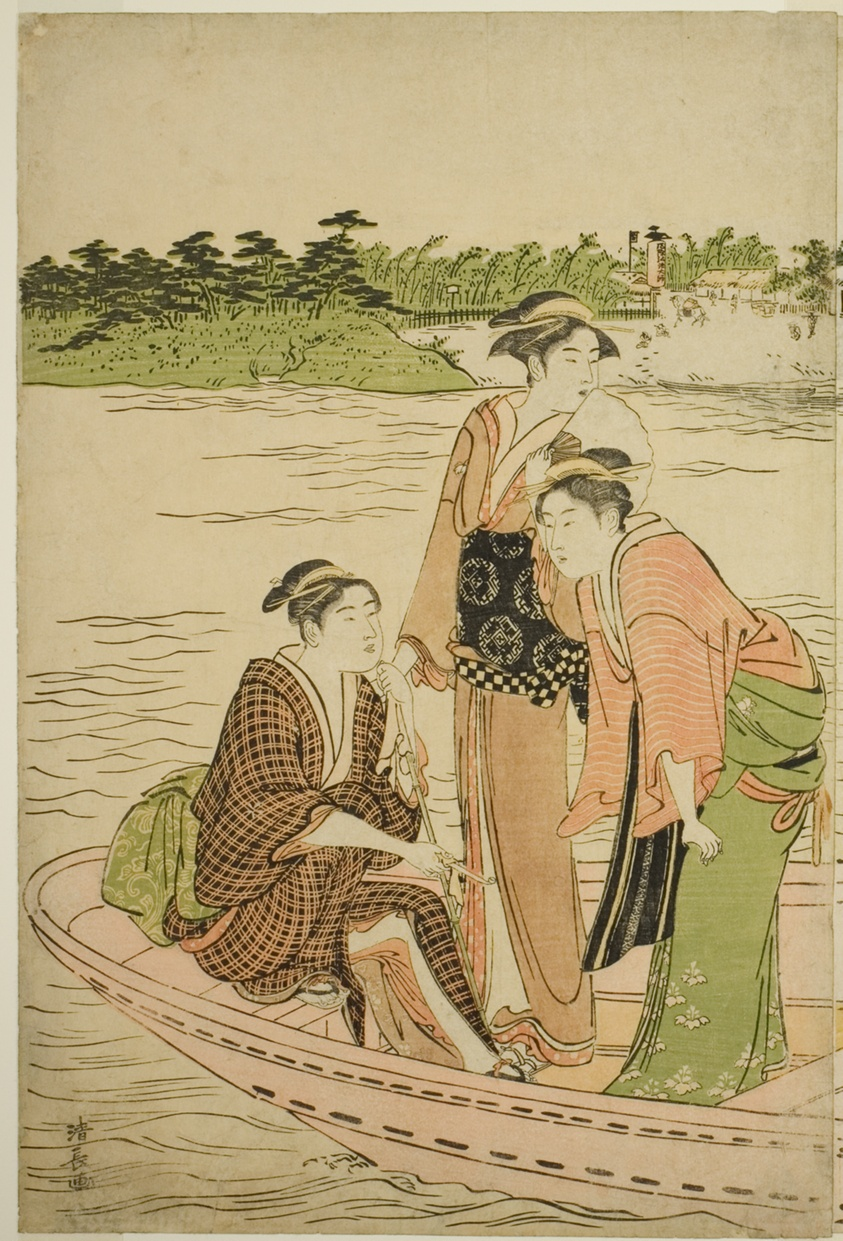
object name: Print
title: Ferry on the Rokugo River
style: Japanese (culture or style)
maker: Torii Kiyonaga (Japanese, 1752-1815)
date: c. 1784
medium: Color woodblock print; left sheet of oban diptych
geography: Japan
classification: woodblock print; print; asian art